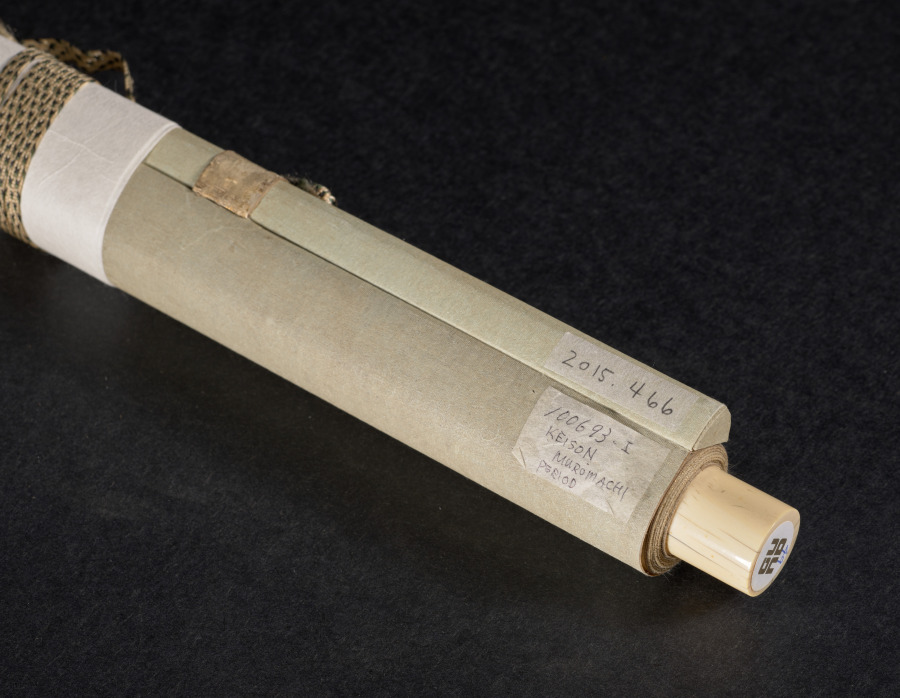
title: Coastal Landscape in the Haboku Style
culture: Japan, Muromachi period (1392–1573)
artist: Keison (Japanese, active late 15th to early 16th century)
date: late 1400s–early 1500s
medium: hanging scroll, ink on paper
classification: Painting